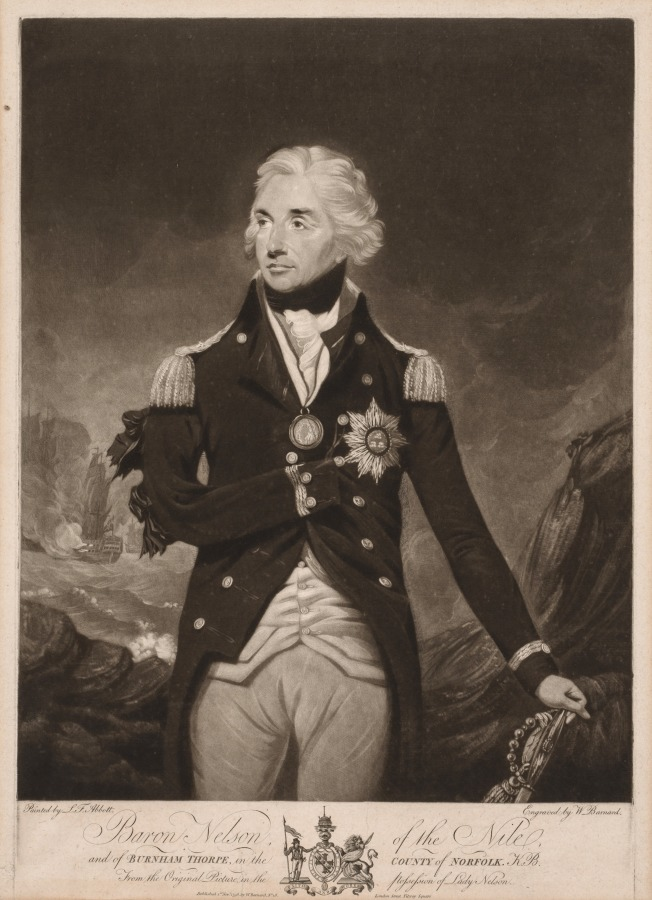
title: Horatio Nelson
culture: England, 19th century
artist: William Barnard (British, 1774–1849)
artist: after Lemuel Francis Abbott (British (modern), 1750-1803)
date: 1798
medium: mezzotint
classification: Print